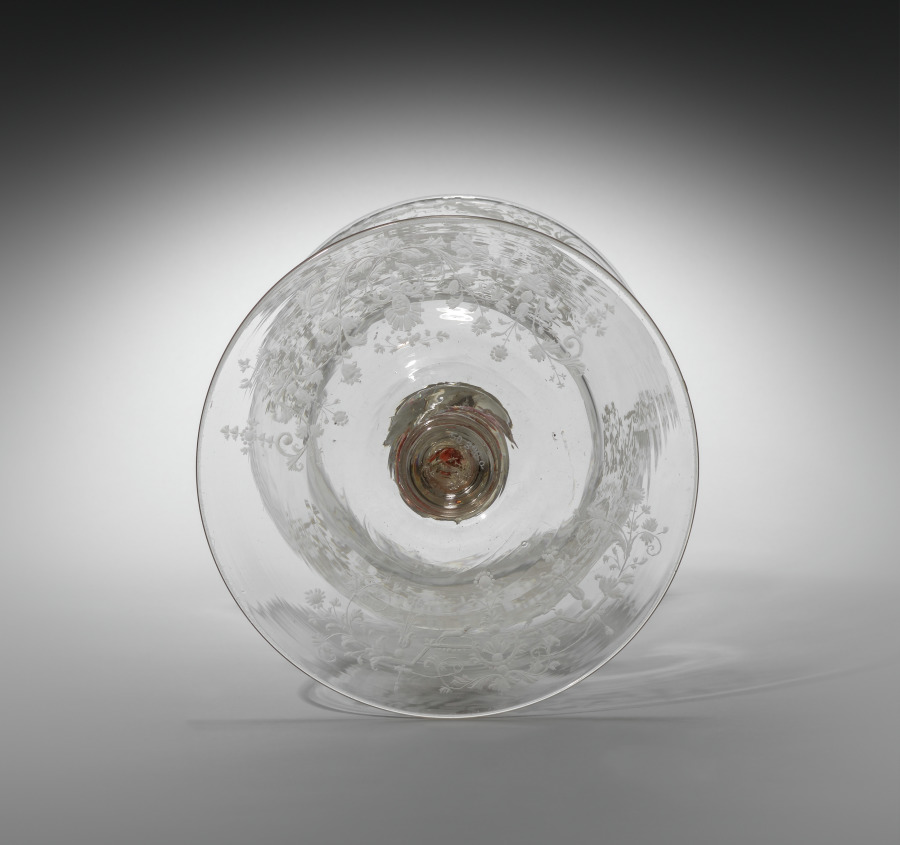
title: Standing Cup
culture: Bohemia, 18th century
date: c. 1715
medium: glass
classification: Glass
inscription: the German inscription engraved around the hunting scene translates as: When sorrow torments us enjoy a glass of wine and also the joy of a hunt; engraved on the opposite side: F.A.K.J.P.V.C.F.Z.S. (Friedrich August Keonig in Polen und Chur Fuerst zu Sachsen).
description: Engraved with arms of Saxony-Poland and Hunting Scene.